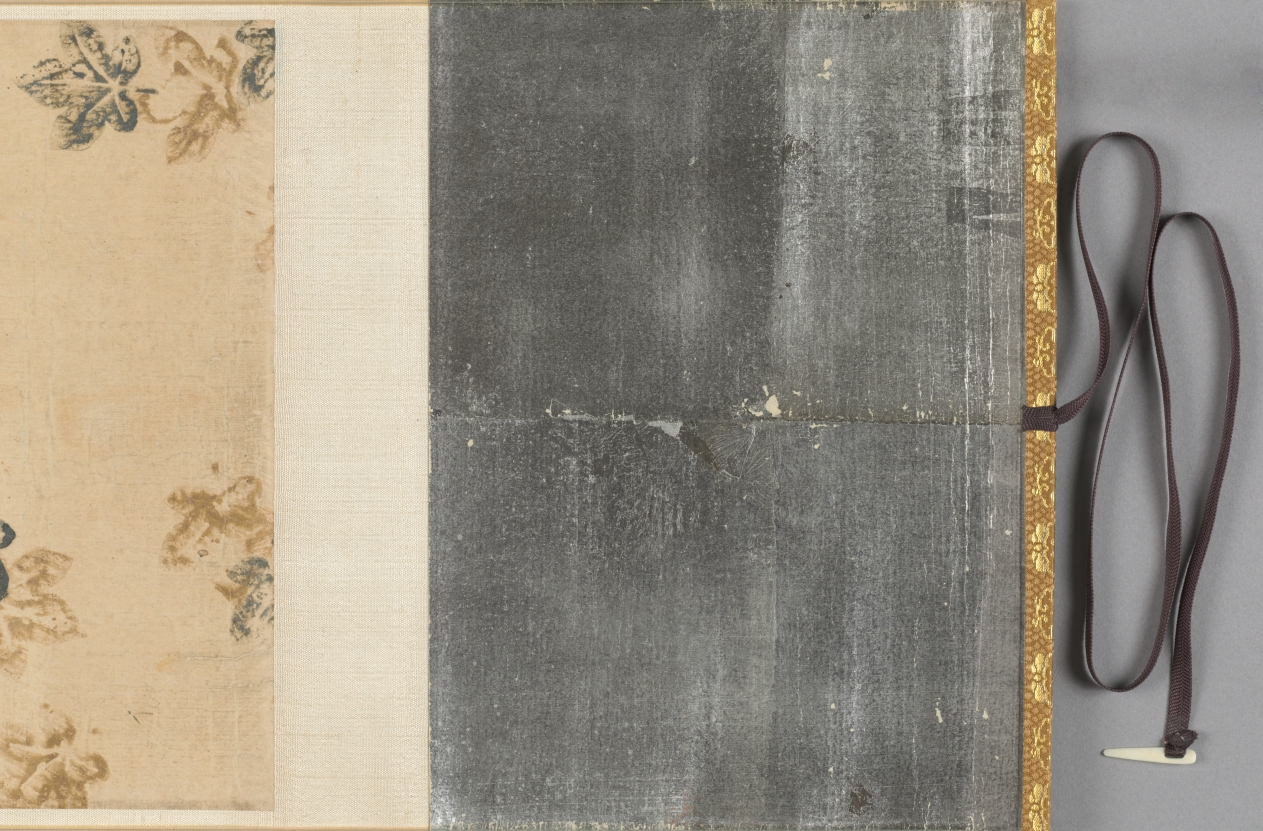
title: Selections from the New Collection of Japanese Poems from Ancient and Modern Times (Shinkokin wakashū) with Printed Designs of Chinese Lions and Crab Finger Grass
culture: Japan, Edo period (1615–1868)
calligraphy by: Hon'ami Kōetsu (Japanese, 1558–1637)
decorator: Tawaraya Sōtatsu (Japanese, c. 1570–c. 1640)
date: early 1600s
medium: handscroll; ink, gold, and silver on paper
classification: Calligraphy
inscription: Seal: 光悦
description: Hon’ami Kōetsu was a calligrapher and craftsman who frequently collaborated with the painter Tawaraya Sōtatsu, considered the first master of the Rinpa school. Kōetsu brushed seven poems from the autumn section of a poetry anthology onto dyed paper with motifs designed and printed in gold and silver by Sōtatsu.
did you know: Before becoming a master painter of screens, Tawaraya Sōtatsu painted fans.